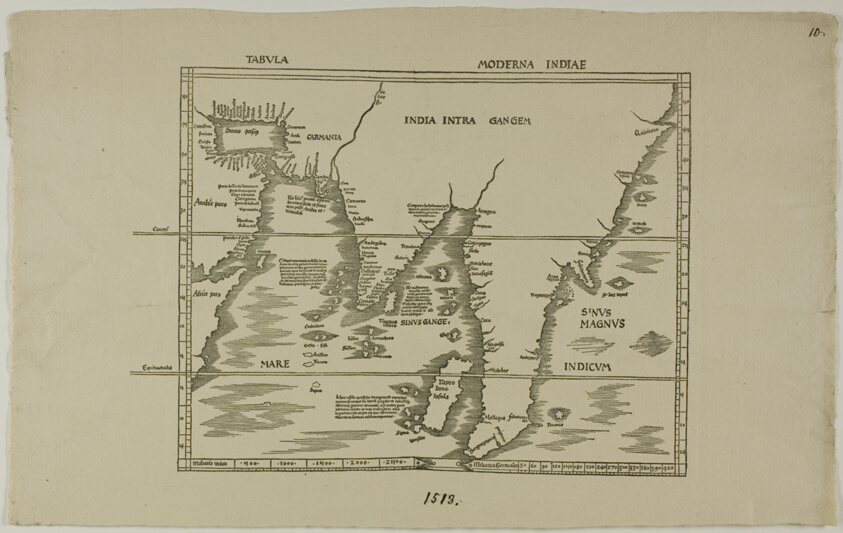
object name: Print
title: Tabula Moderna Indiae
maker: Unknown Artist; English, 19th century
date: 1513, reprinted 1889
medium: Woodcut in black on cream laid paper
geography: England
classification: reproduction; print; prints and drawing